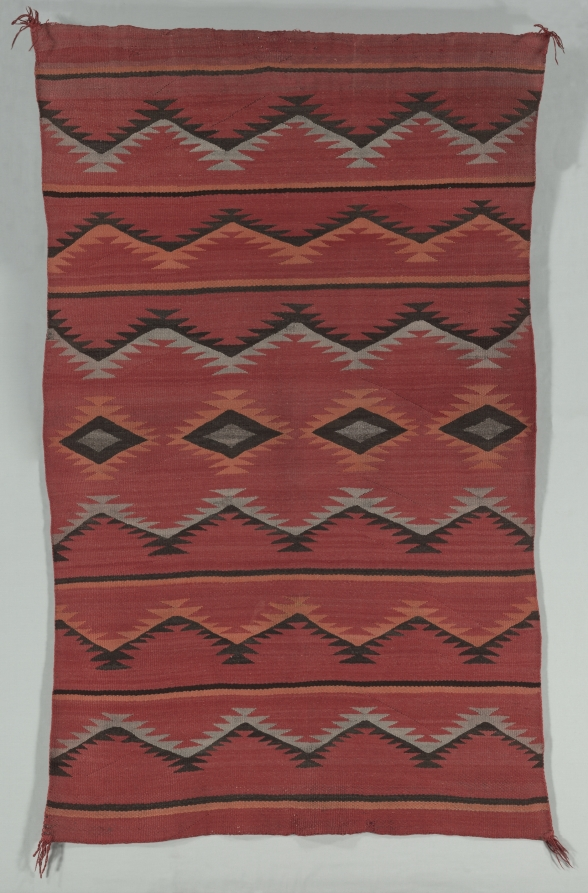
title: Banded Eyedazzler Style Rug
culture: America, Native North American, Southwest, Navajo, Post-Contact, Transitional Period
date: ca. 1890–1900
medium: tapestry weave: wool (handspun)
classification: Textile